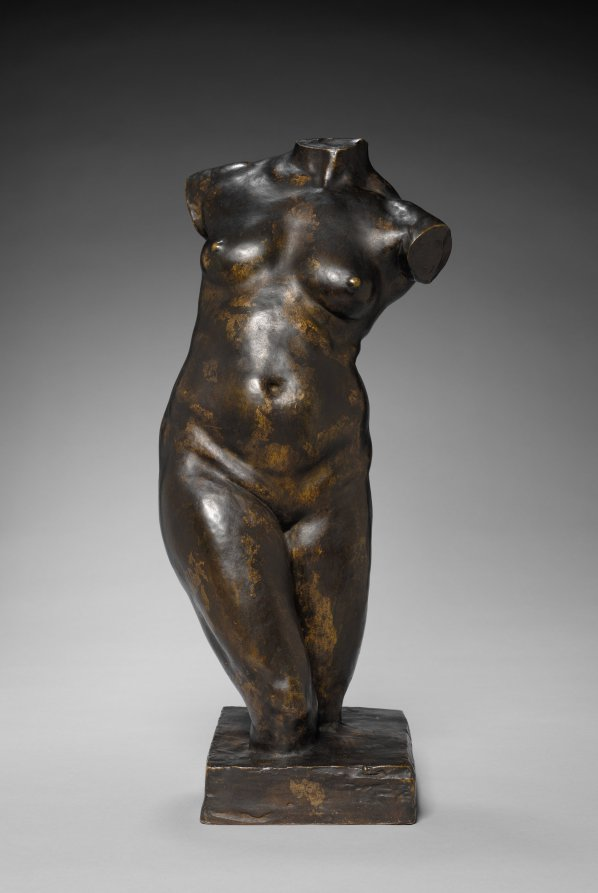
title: Torso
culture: France, 19th century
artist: Jules Dalou (French, 1838–1902)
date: c. 1850 – 1899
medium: bronze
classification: Sculpture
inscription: Signed: "J. Dalou"; "Susse Fres. Ed[ts] Paris"